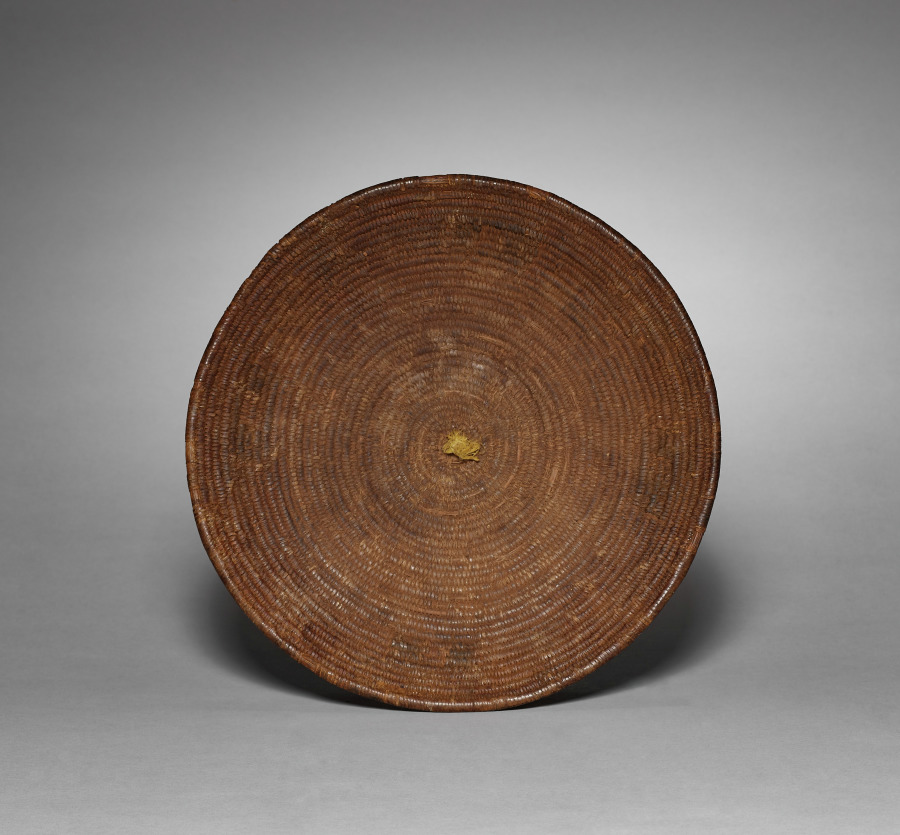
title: Pot Lid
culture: Africa, Southern Africa, South Africa, Zulu-style maker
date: 1900s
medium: Plant fiber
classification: Implements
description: This large, beautifully shaped vessel was used for the serving of beer, an essential component of Zulu hospitality. Undecorated vessels were for private household use, and ornamented examples were reserved for guests. Zulu pottery is produced by women, and is typically thin-walled, with a burnished black surface. Decoration may be incised around the shoulder, as in this example, or may consist of raised bumps that resemble body scarification. The basketry lid protects the vessel's contents from flies or debris; contemporary pot lids are often woven of telephone wire with a colorful plastic coating